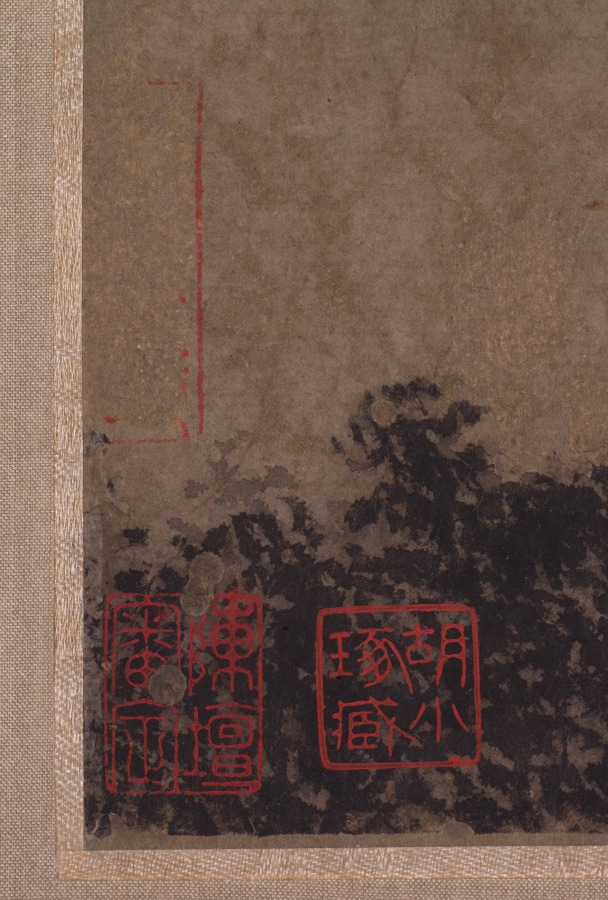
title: Landscape Ink-Play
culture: China, Yuan dynasty (1271-1368)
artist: Fang Congyi (Chinese, active c. 1340–80)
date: 1300s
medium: hanging scroll; ink and color on paper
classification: Painting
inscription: Inscription and 2 seals in the upper right. 2 complete seals and 1 partial in the lower left.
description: The painter created a paradoxical juxtaposition of the boat serenely sailing against the turbulent onrushing movement of the towering mountains in the background.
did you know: Fang Congyi was a painter and a Daoist priest.